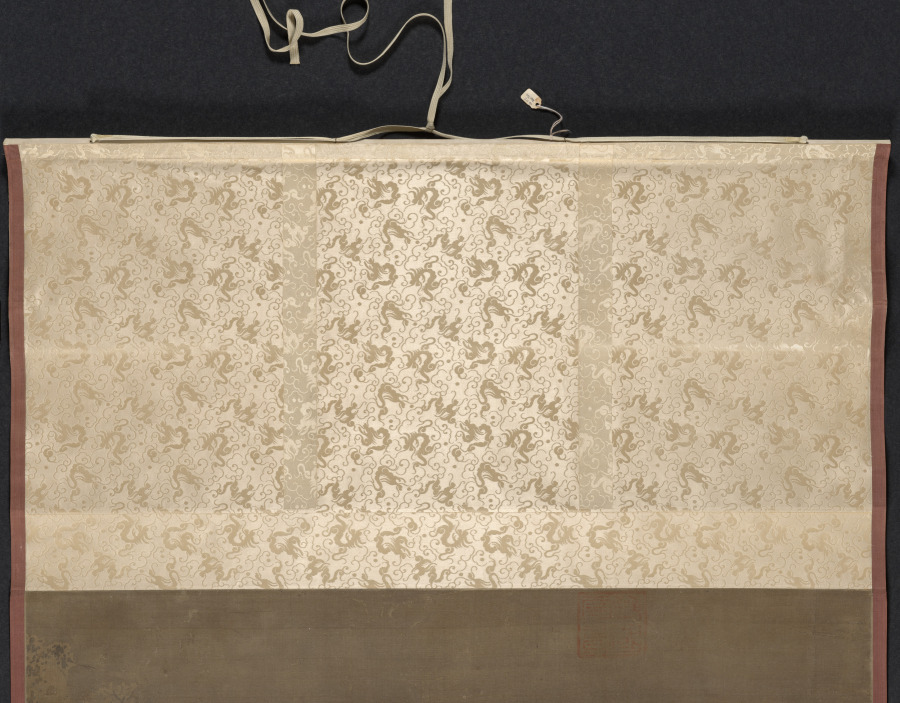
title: Birds in a Grove in a Mountainous Winter Landscape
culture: China, Jin dynasty (1115-1234)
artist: possibly by Gao Tao (Chinese, 1100s)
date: 1100s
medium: hanging scroll; ink and slight color on silk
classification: Painting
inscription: A signature and a seal at lower left edge: Gao Tao 高燾; seal undecipherable. 10 additional seals: 1 of Zhu Gang 朱棡 [1358–1398]; 3 of Suo’etu 索額圖 [1636–1703]; 2 of A’erxipu 阿爾喜普 [1700s]; 1 of Weng Fanggang 翁方綱 [1733–1818]; 3 unidentified.